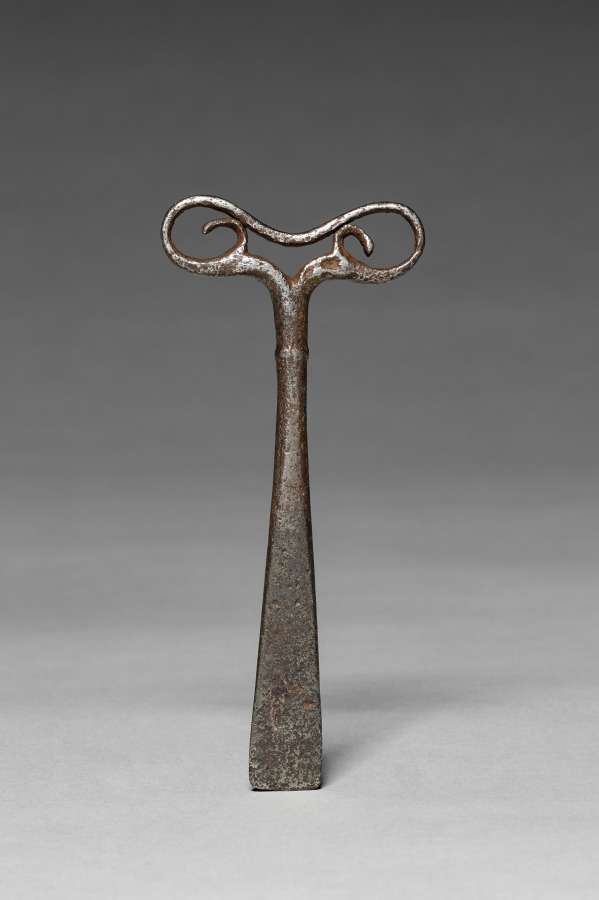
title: Screw Driver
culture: Europe, 16th-17th century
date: 1500s–1600s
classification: Tool